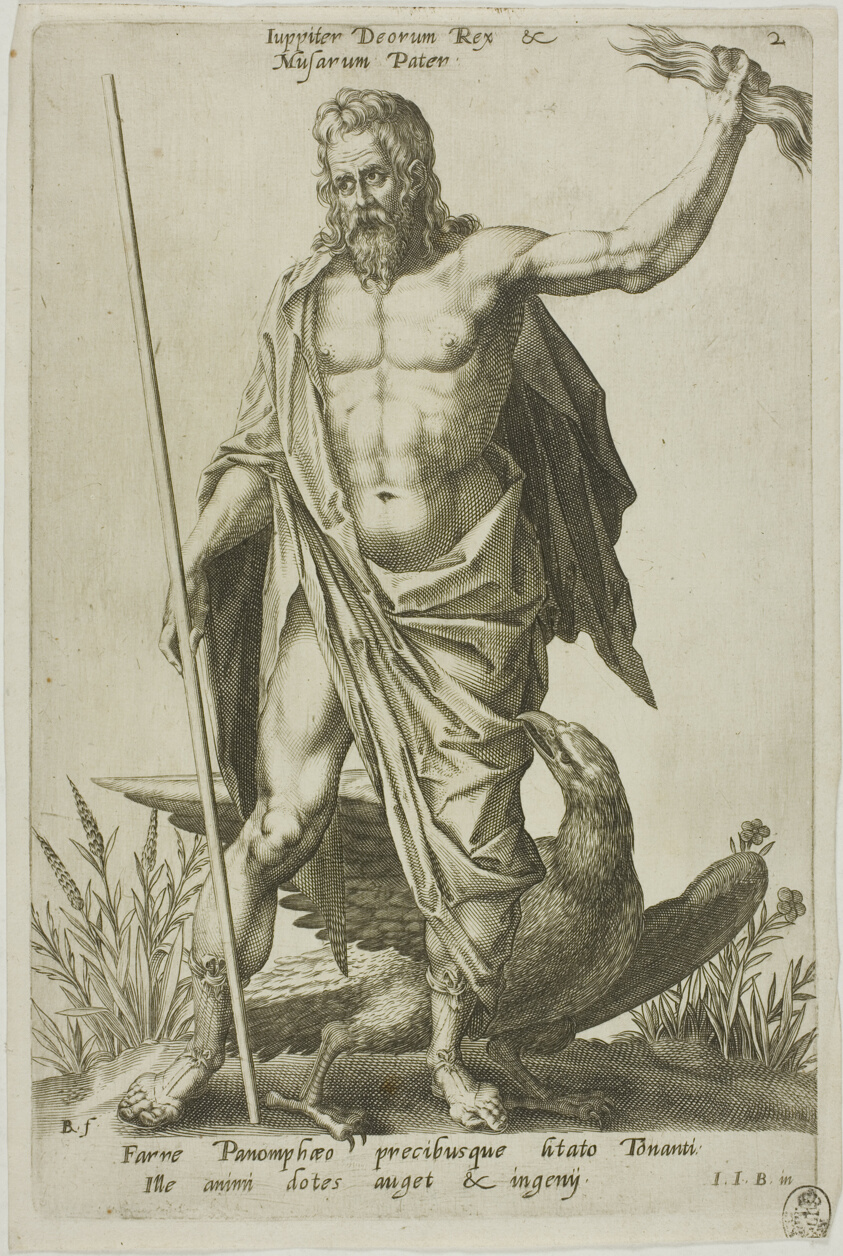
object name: Print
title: Jupiter, plate 2 from Parnassus Biceps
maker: Robert Boissard (French, c. 1570–after 1597); after Jean-Jacques Boissard (French, 1533-1598)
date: 1601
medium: Engraving in black on ivory laid paper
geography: Frankfurt an der Oder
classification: engraving; print; prints and drawing